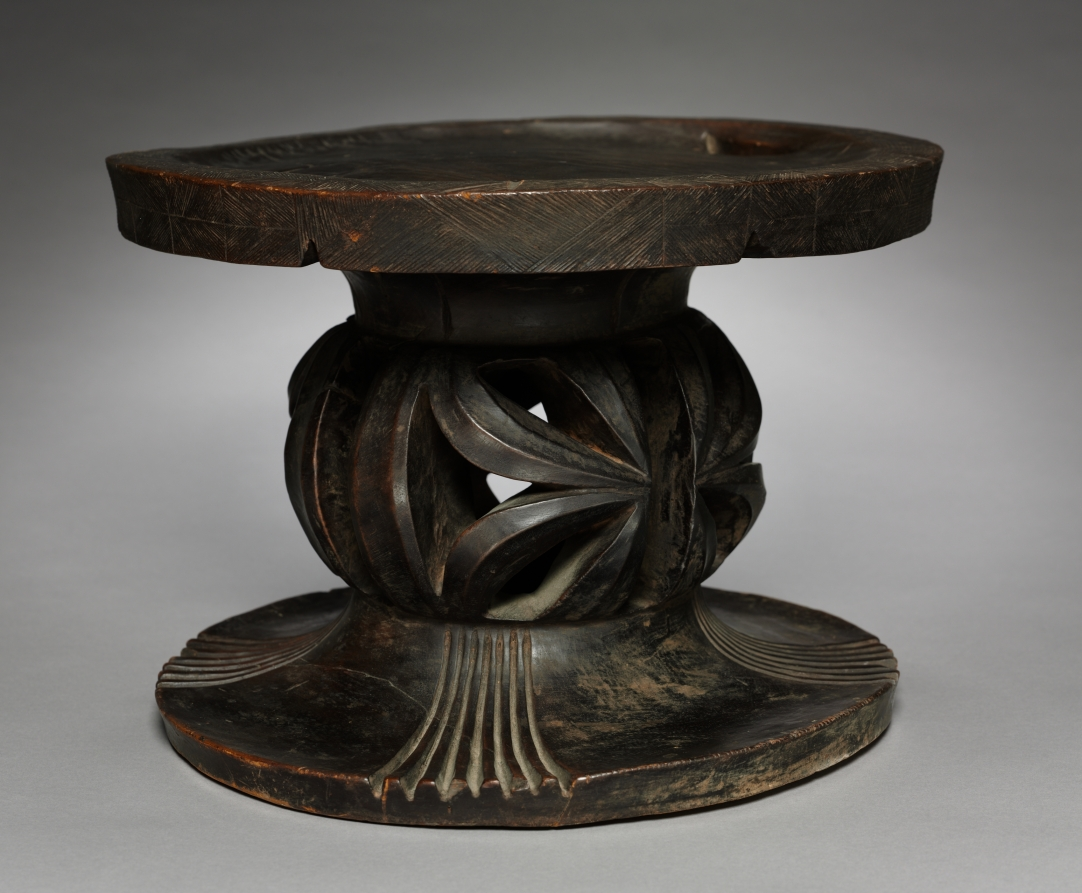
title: Stool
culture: Africa, Central Africa, Democratic Republic of the Congo, Mangbetu-style maker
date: by 1928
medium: wood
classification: Furniture and woodwork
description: Such stools were highly prized by their female owners. Sculpted by master artists with widespread reputations, they were often "signed" with a deeply cut mark on the base. This groove was then filled with red camwood as an expression of blessings and good wishes for the stool's owner.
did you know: In 1928, Paul Travis photographed the Mangbetu queen who once owned this stool as she sat on it.